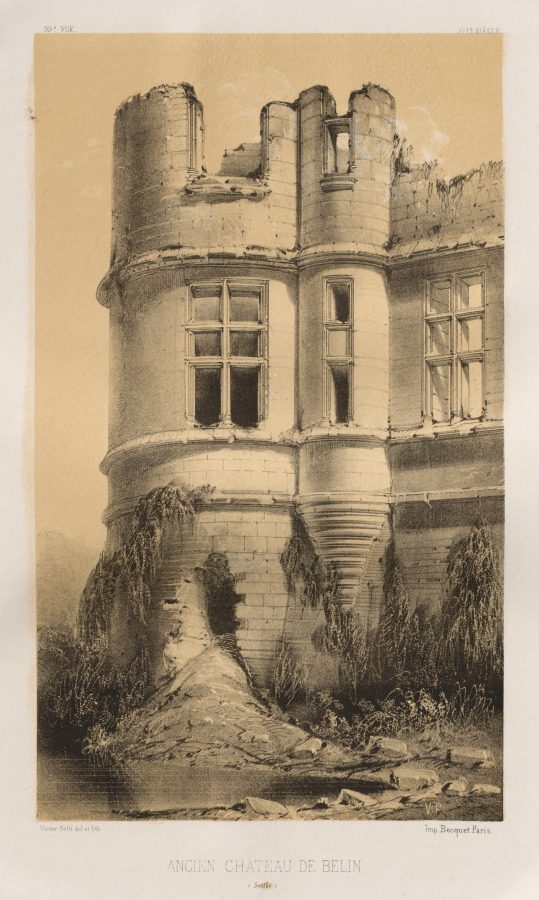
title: Architecture Pittoresque ou Monuments des XVeme. Et XVIeme. Siecles: Chateaux de France des XV et XVI Siecles: Pl. 99, Ancien Château de Belin (Sarthe)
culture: France, 19th century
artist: Victor Petit (French, 1817–1874)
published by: Charles Boivin (publisher and editor); Lith de Godard a Paris (printer)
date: 1860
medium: lithograph with tint stone, from portfolio of 100 lithographs with tint stone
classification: Print